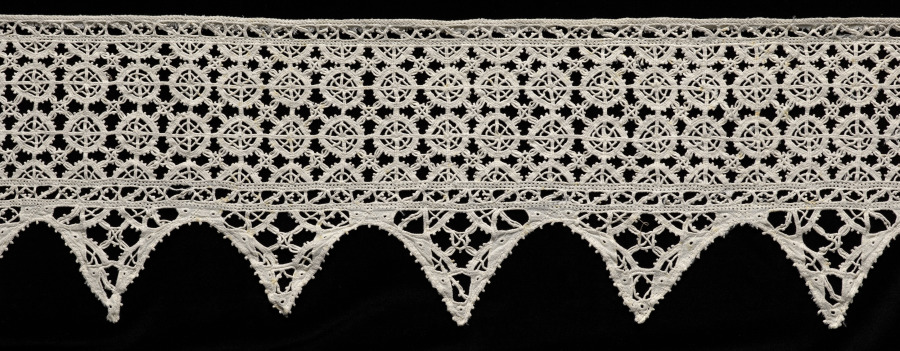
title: Lace Fragment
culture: Italy, 1700s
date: 1700s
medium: Linen: needle lace (Reticella) and cutwork edging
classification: Lace